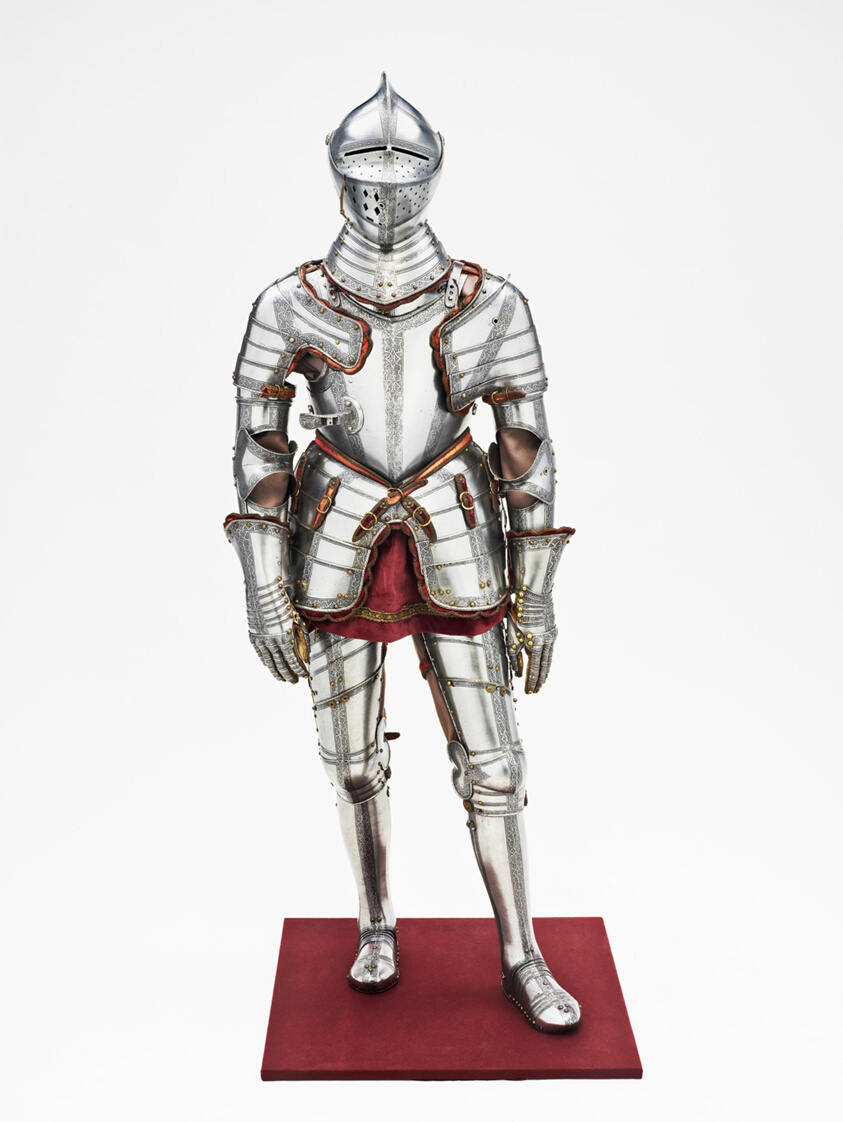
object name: Armor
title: Armor for the Field and Tourney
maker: South German or Austrian (Probably Innsbruck)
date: 1560/70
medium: Steel, brass, traces of gilding, leather, and velvet textile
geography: Innsbruck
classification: suit; armor; arms and armor